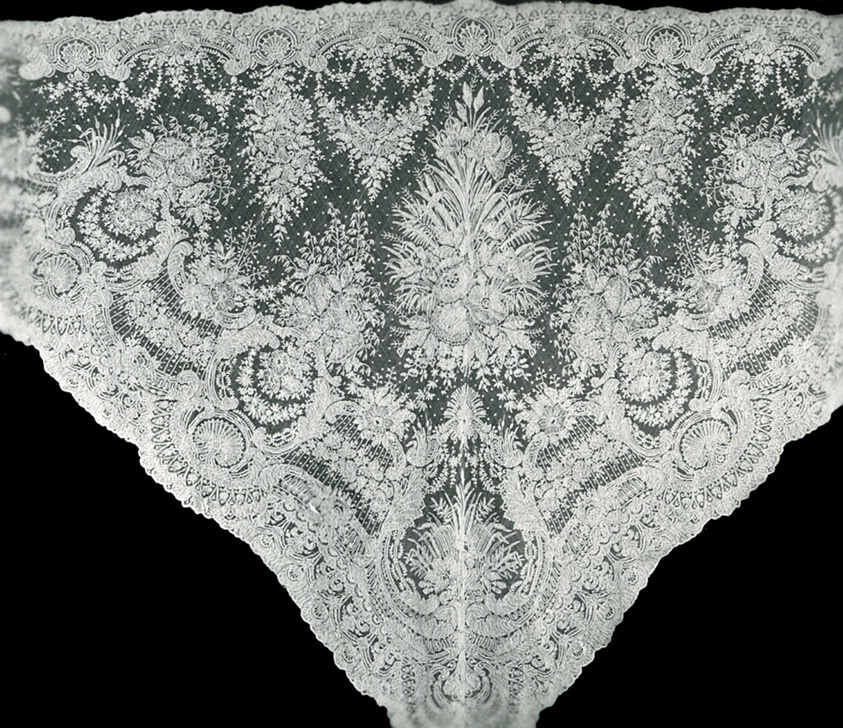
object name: Textile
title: Half Shawl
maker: England or France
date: 1860s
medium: Silk and mohair, Pusher machine lace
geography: England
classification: textile; lace - machine